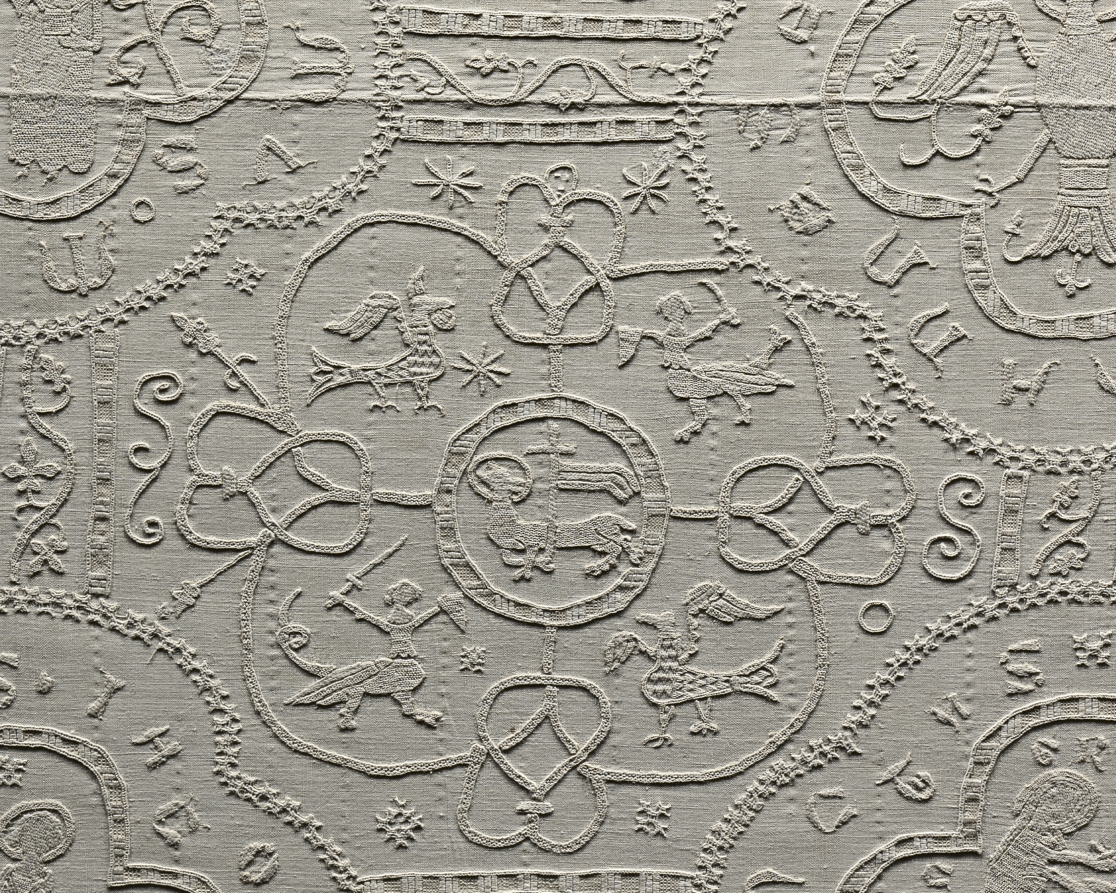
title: Altar Cloth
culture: Germany, Altenberg on the Lahn, Premonstratensian Convent, 14th century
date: c. 1350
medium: embroidery: linen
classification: Embroidery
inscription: various motifs enclosed in quatrefoils with identifying inscriptions in Gothic letters.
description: This large, embroidered altar cloth is one of the rarest, most important medieval church furnishings in existence. It was stitched by nuns in the Premonstratensian Convent in Altenberg on the Lahn River, north of Frankfurt, Germany, and was used to cover the church’s high altar in the weeks leading up to Easter. The cloth is an example of linen embroidery, a specialty of German nuns in the later Middle Ages. The Altenberg monastery church once had valuable furnishings; the high altar retable (a decorated frame with sculptures and paintings on the top of an altar) has survived, the main parts of which are now in the Städel Museum in Frankfurt, Germany.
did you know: When lit from behind, the previously hidden details emerge and the complex design becomes evident.